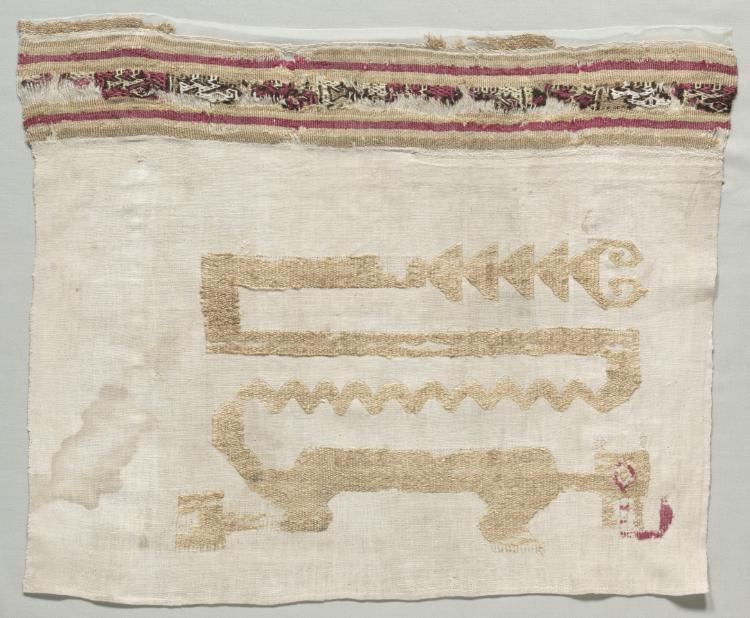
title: Fragment from a Mantle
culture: Peru, North Coast, Chimú Culture, 12th-15th century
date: c. 1100–1400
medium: tabby, brocaded; border: single-face pattern weave (fancy twill); cotton and wool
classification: Textile